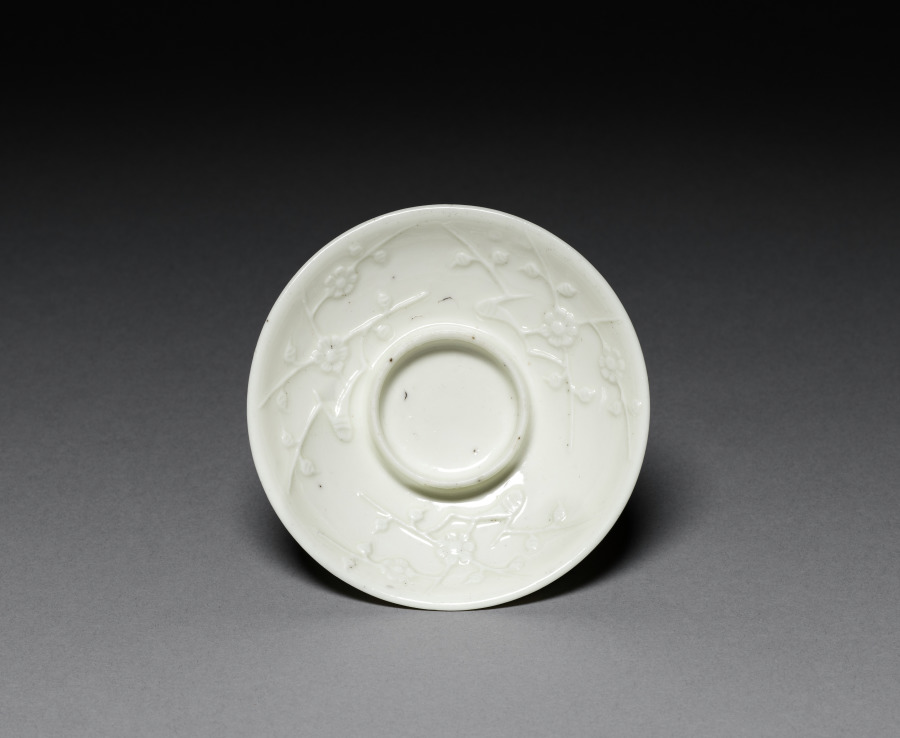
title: Saucer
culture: France, 18th century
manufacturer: Saint Cloud Porcelain Factory (French)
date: 1775–1799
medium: soft-paste porcelain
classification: Ceramic